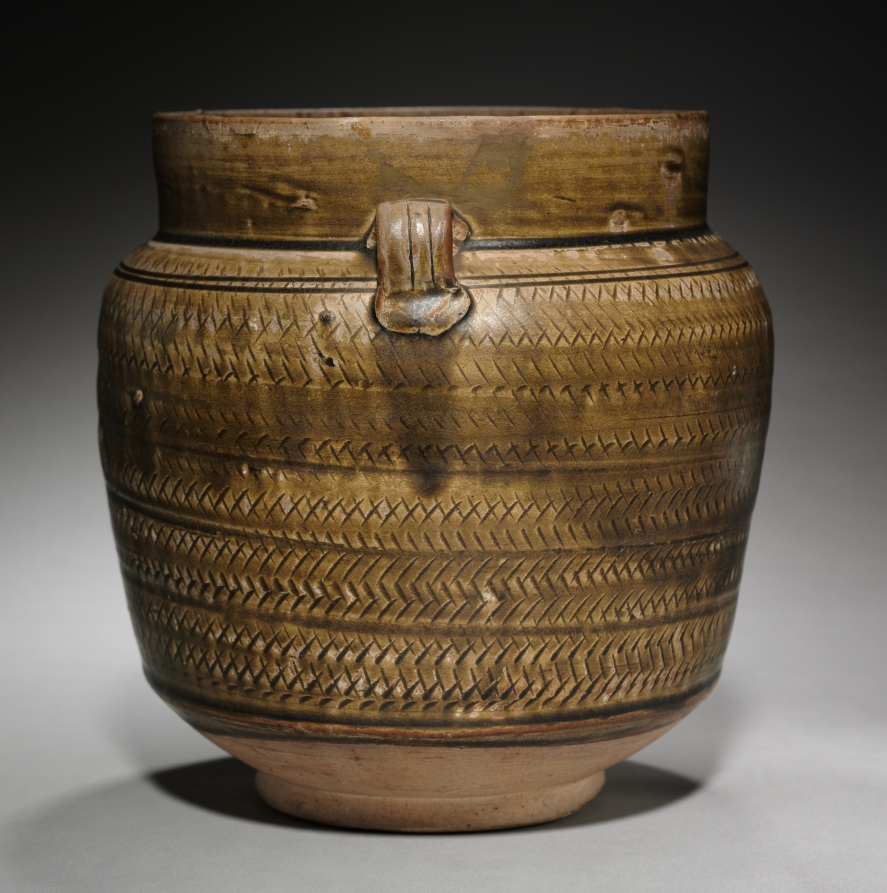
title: Jar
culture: China, Northern, Tang dynasty (618-907) - Five dynasties (907-960)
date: 800s–900s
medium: Glazed pinkish-buff stoneware; Brown ware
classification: Ceramic